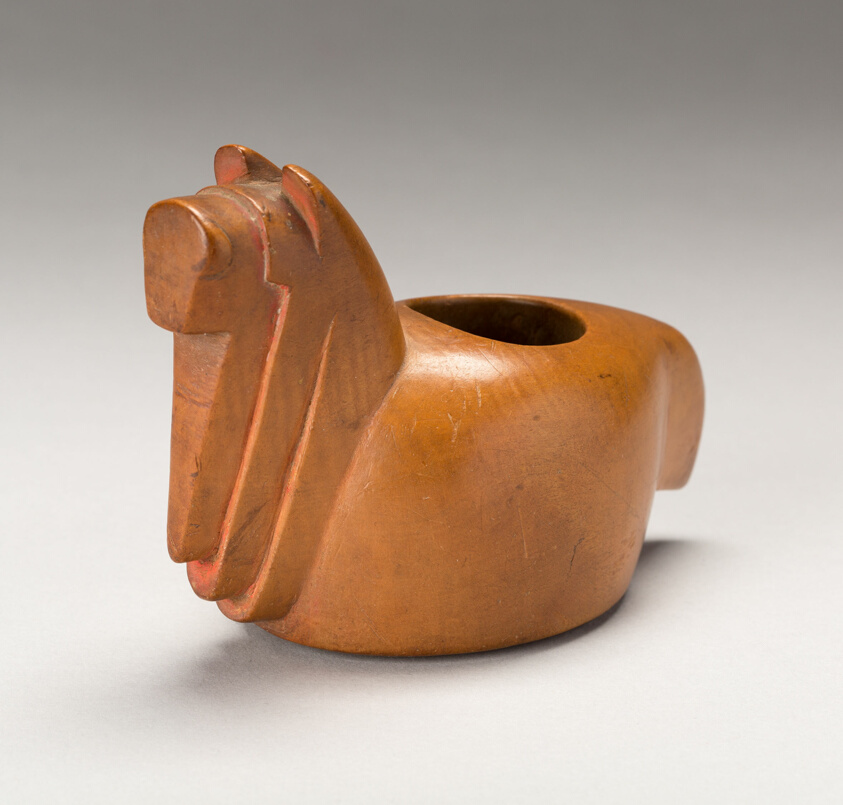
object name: Religious/Ritual Object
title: Offering Vessel in the Form of a Llama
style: inca, late intermediate period, Pre-Columbian, americas, Arts of the Americas, andean, andes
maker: Inca (Probably central coast, Peru)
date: 1450–1532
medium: Wood with pigment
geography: Peruvian Central Coast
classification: wood; sculpture; art of the americas; ritual objects